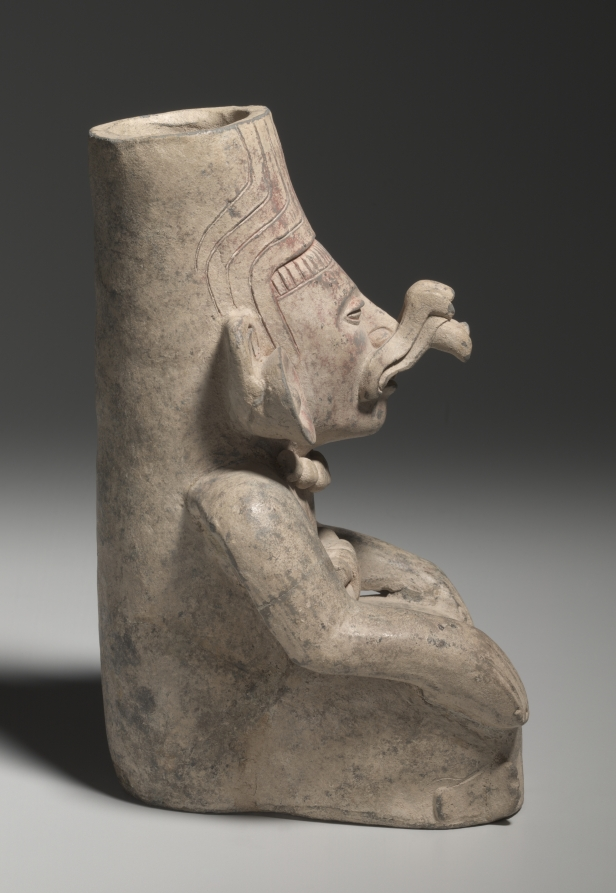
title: Urn Figure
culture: Mexico, Oaxaca, Zapotec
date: c. 200–500 CE (thermoluminescence date, 60 BCE–390 CE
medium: earthenware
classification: Sculpture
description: The figure projecting from the front of a cylindrical container wears a mouth mask perhaps shaped as a serpent’s fanged upper jaw. It probably served in a tomb as a companion to a larger, more complex figural urn. Though termed "urns," these ceramics do not contain the cremated ashes of the dead but usually are found empty.